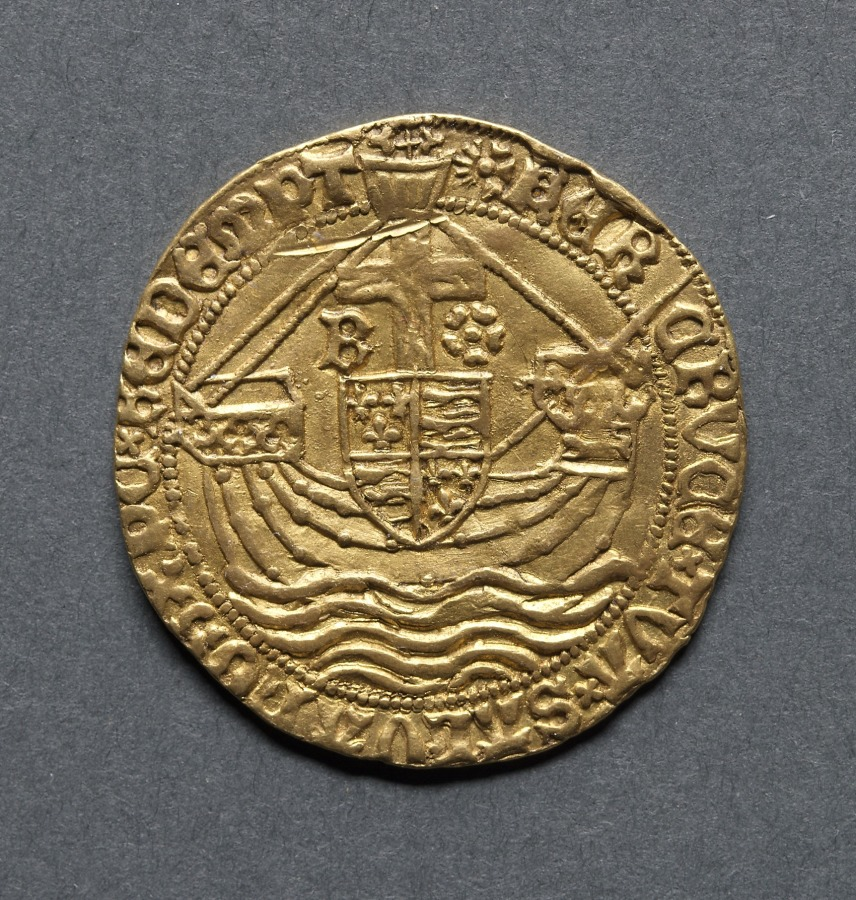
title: Angel: St. George Slaying the Dragon (obverse); Ship with Shield of Arms and Cross (reverse)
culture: England, Richard III, 1483-1485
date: 1483–85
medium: gold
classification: Coins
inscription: RICARD DIGRA REX ANGL Z FRANC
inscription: PER CRVCE TVA SALVA NOS XPC REDEMPT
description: This coin is similar to the angel of Henry VI, 1969.167, but from completely different dies. Between the second reign of Edward IV and the reign of Richard III, Edward V, at the age of 13, reigned briefly from April 9 to June 22, 1483. Richard, Edward's uncle, caused the boy to be imprisoned in the Tower where he and his younger brother were murdered at the instigation of Richard. Their bodies were buried under a staircase and lay undiscovered for 200 years. Richard, who had been Protector during the reign of Edward V, was crowned king. The initial mark, half-rose and sun, once thought to indicate the coins of Edward V, was been assigned to those of Edward IV. The only coins of Edward V which can definitely be attributed to his reign are those with the mink mark boar's head that was also the mark of Richard III. Only five examples of gold angels of Edward V exist.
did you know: The reverse side shows an English galley, the monogram R, and a rose representing the House of York.